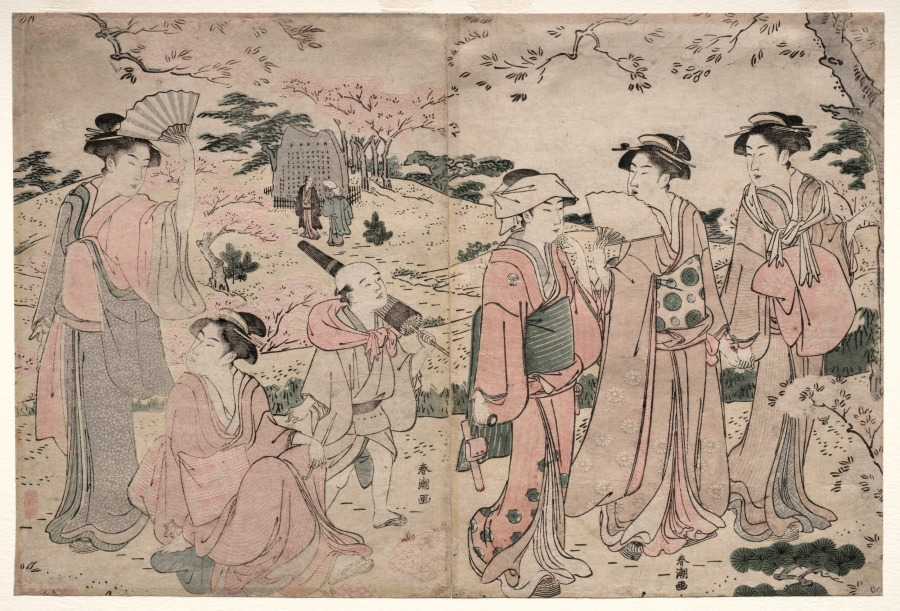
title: Women Viewing Cherry Blossoms at Asukayama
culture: Japan, Edo period (1615–1868)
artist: Katsukawa Shunchō (Japanese)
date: 1780s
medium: color woodblock print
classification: Print